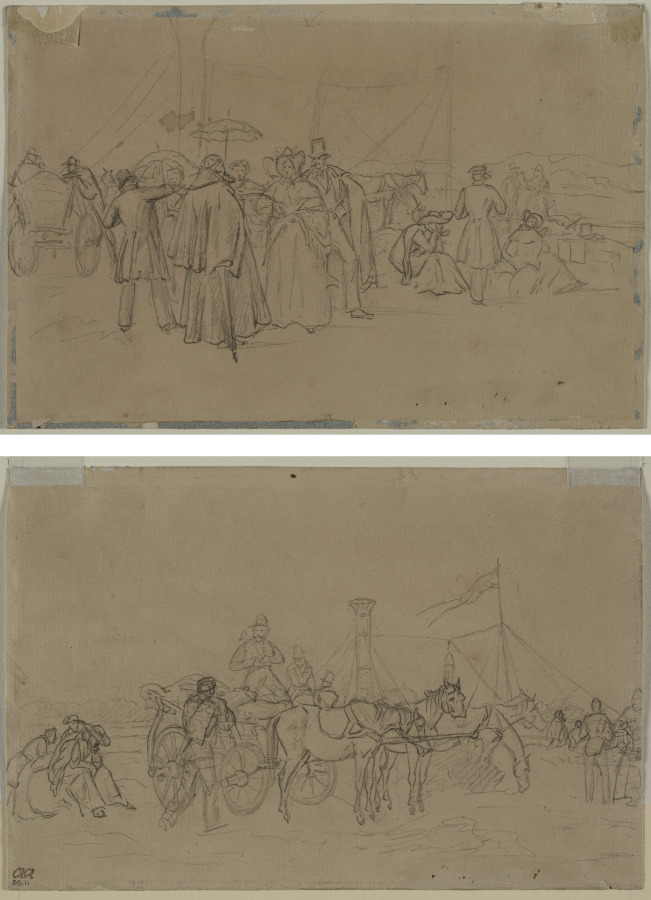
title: Passengers for Rhine Steamer (recto) Passengers for Rhine Steamer (verso)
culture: Germany, 19th century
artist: Heinrich von Mayr (German, 1806–1871)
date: second or third quarter 1800s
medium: graphite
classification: Drawing